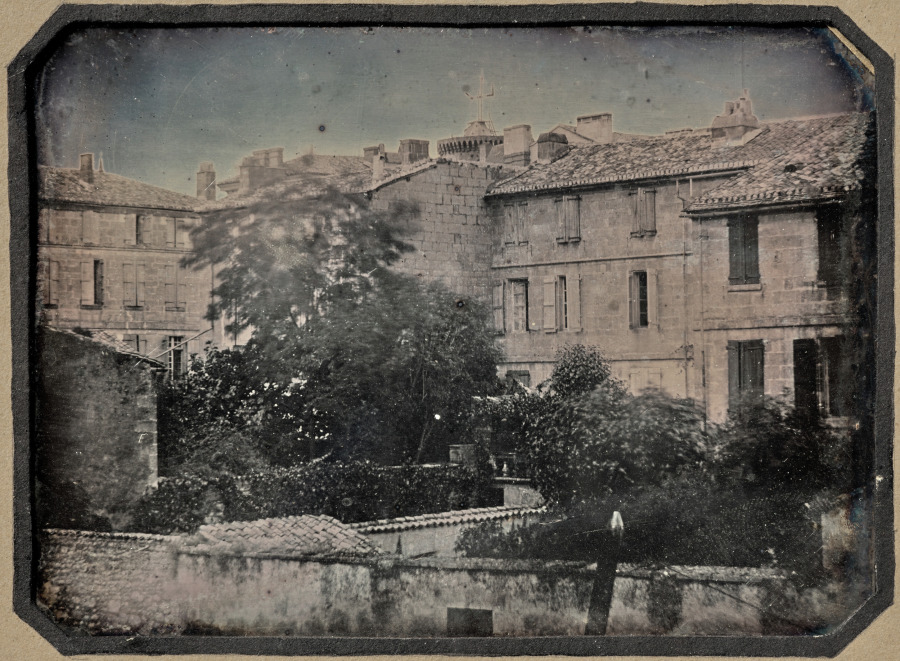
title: View of Angoulême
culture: France, 19th century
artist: Paul Michel Hossard (French, 1787–1862)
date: c. 1844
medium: daguerreotype, applied color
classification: Photograph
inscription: Written in pencil on verso: "HOSSARD"; Angoulême"; [additional writing in pencil is faded and unclear]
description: Paul Michel Hossard was an amateur daguerreotypist, especially noted for his architectural views. Rather than depicting a famous monument or landmark, this informal composition captures the charm of courtyards and houses in a small city in western France. The dominant horizontal lines of the buildings are contrasted with the soft, organic forms of the foliage. The presence of a breeze is suggested by the slight blurring of the tallest trees—the result of the long exposure time needed to make this image.